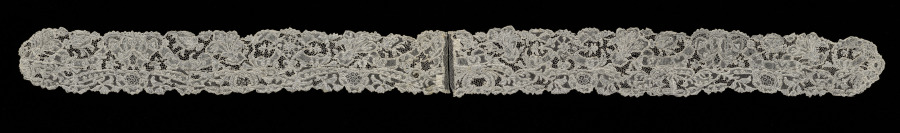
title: Pair of Lace Lappets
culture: France, Alençon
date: 1715–74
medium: Linen: needle lace (Point d'Alençon)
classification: Lace